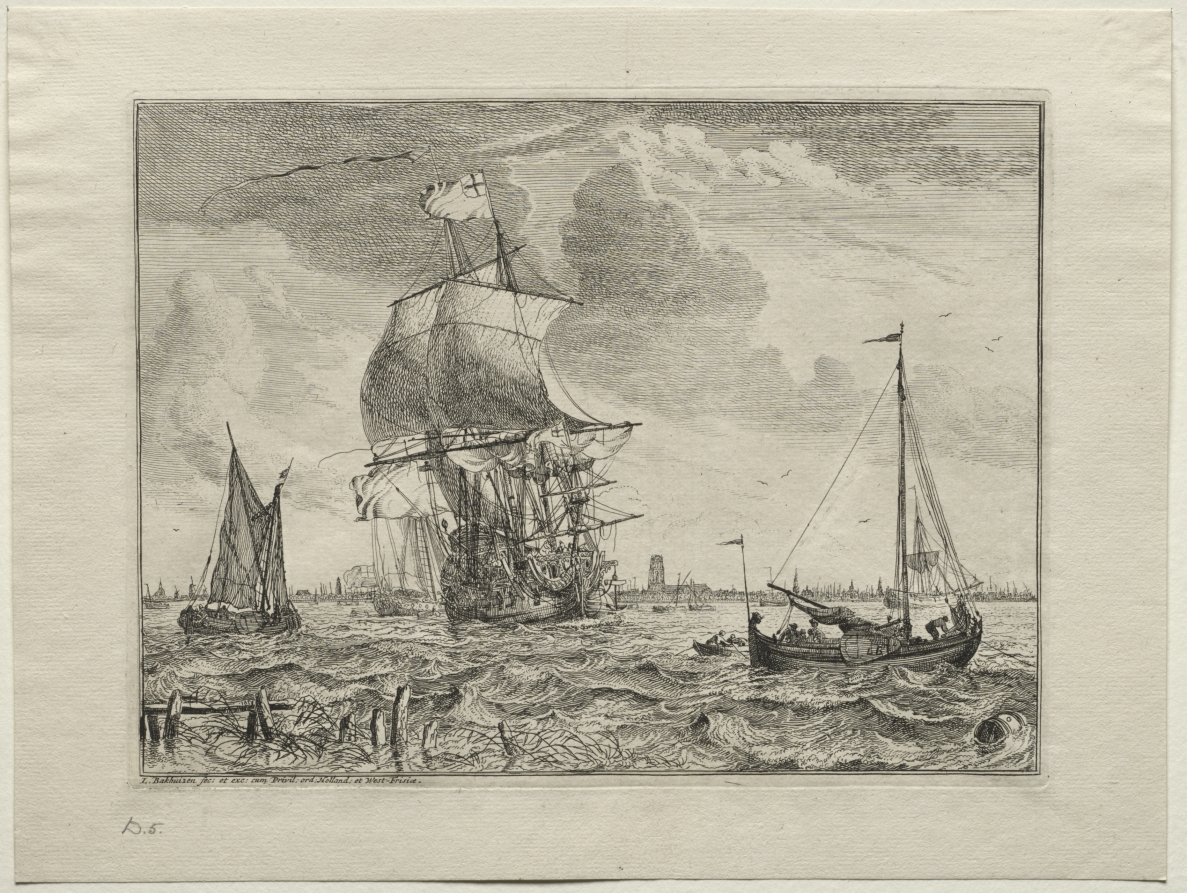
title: Marine Scene with Amsterdam in the Distance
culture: Netherlands, early 18th century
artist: Ludolf Backhuysen (Dutch, 1631–1708)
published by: Ludolf Backhuysen (Dutch, 1631–1708)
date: 1701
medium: etching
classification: Portfolio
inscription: lower left, in plate: 1701[in reverse] ; lower left, in plate: L. Bakhuizen fec: et exc: cum Privil: ord: Holland: et West-Frisiæ. ; lower right, in plate: LB ; lower left, in graphite: D. 5.